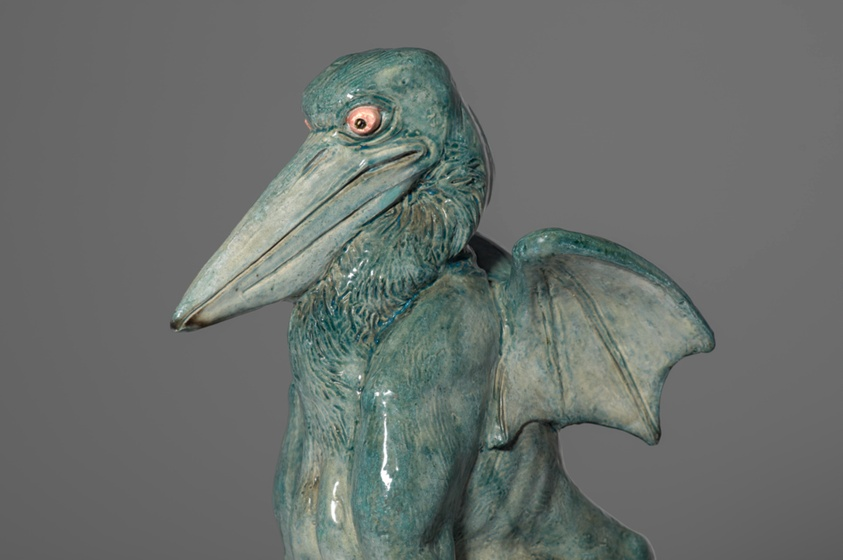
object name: Ceramics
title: Pelican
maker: Emmanuel Fremiet, French, 1824–1910; Made by Émile Muller et Cie, Ivry-sur-Seine, France, 1854–1908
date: c. 1896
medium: Glazed stoneware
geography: France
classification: sculpture; ceramics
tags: mythological figures, animals, bird, pelican, wings